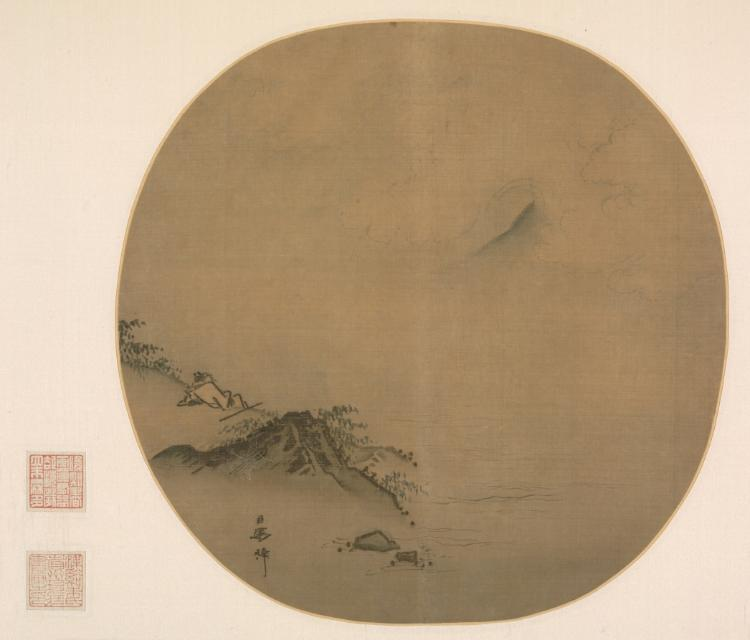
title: Scholar Reclining and Watching Rising Clouds, Poem by Wang Wei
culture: China, Southern Song dynasty (1127-1279)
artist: Ma Lin (Chinese, c. 1185–after 1260)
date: c. 1256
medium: Album leaf; ink on silk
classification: Painting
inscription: 臣馬麟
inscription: 2 seals on mounting of Chu Sheng-chai (20th c.).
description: Poem and painting, once mounted together as one fan, exemplify the collaboration between imperial patron and court painter. Emperor Lizong’s calligraphy cites a verse from Wang Wei’s (701–761) poem, Walking to where the water ends, I sit and watch when clouds arise. Ma Lin’s response is this painting. At the water’s edge, a scholar reclines by a large rock. The view leads across the empty middle ground to a distant mountain. With sparse ink and subtly graded washes, Ma Lin visualizes the poetic verse. The painting suggests the impact of Chan aesthetics through interaction between the palace, literati-officials, and monasteries around Hangzhou.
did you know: Ma Lin was the son of Ma Yuan, the artist renowned for his unique composition and often referred to as "One-corner Ma."